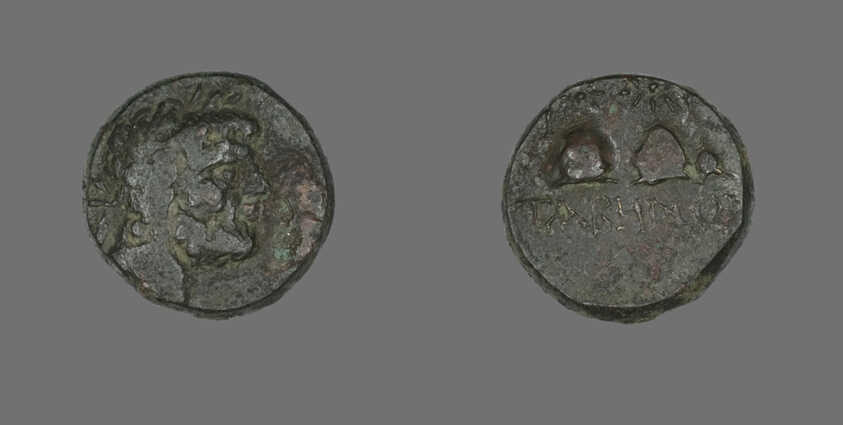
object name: Coin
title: Coin Depicting the God Zeus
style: greek, ancient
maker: Greek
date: 1st century BCE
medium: Bronze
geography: Ancient Greece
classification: coin; ancient art